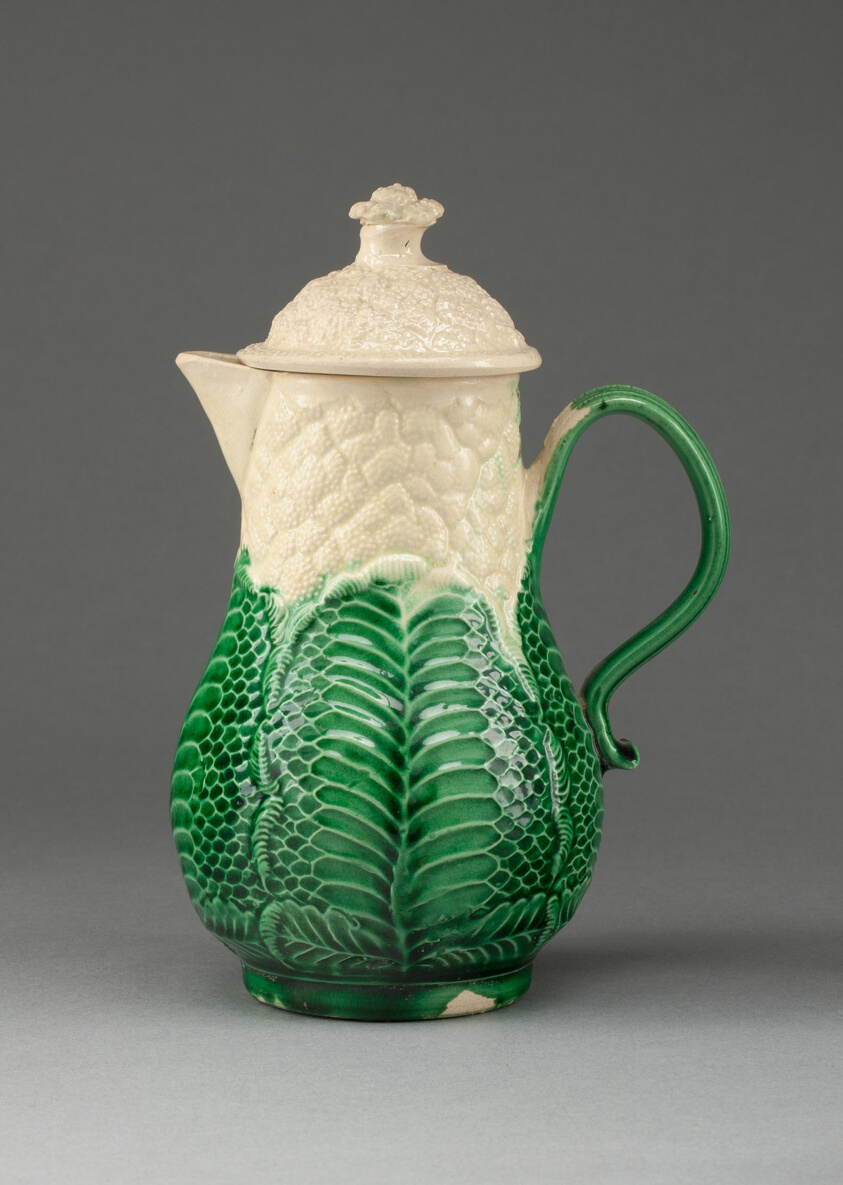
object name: Ceramics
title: Milk Jug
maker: Staffordshire, England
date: 1765/80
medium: Lead-glazed earthenware (creamware)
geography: Staffordshire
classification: earthenware; ceramics; creamware; european decorative arts; lead-glazed earthenware